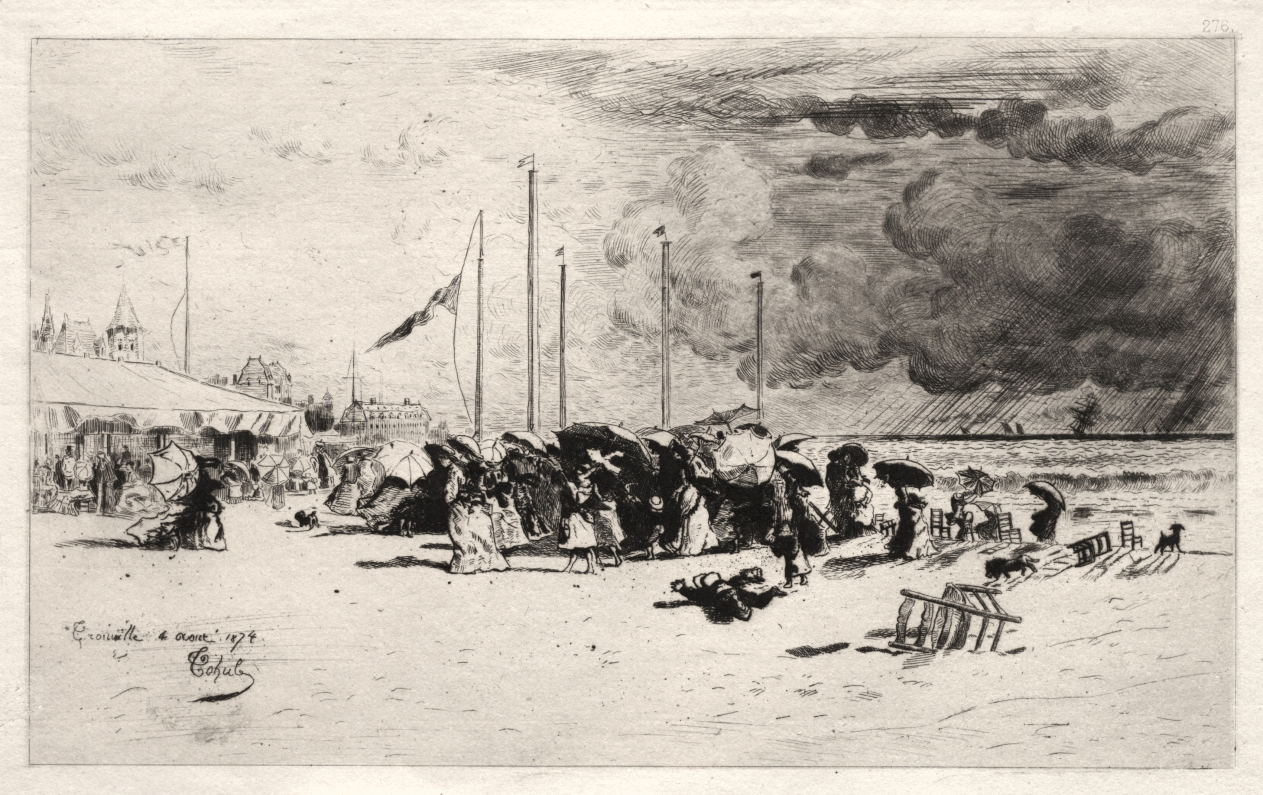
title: The Squall at Trouville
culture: France, 19th century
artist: Félix Hilaire Buhot (French, 1847–1898)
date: 1874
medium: etching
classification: Print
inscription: lower left, in plate: "Trouville 4 aôut 1874 Tohub"